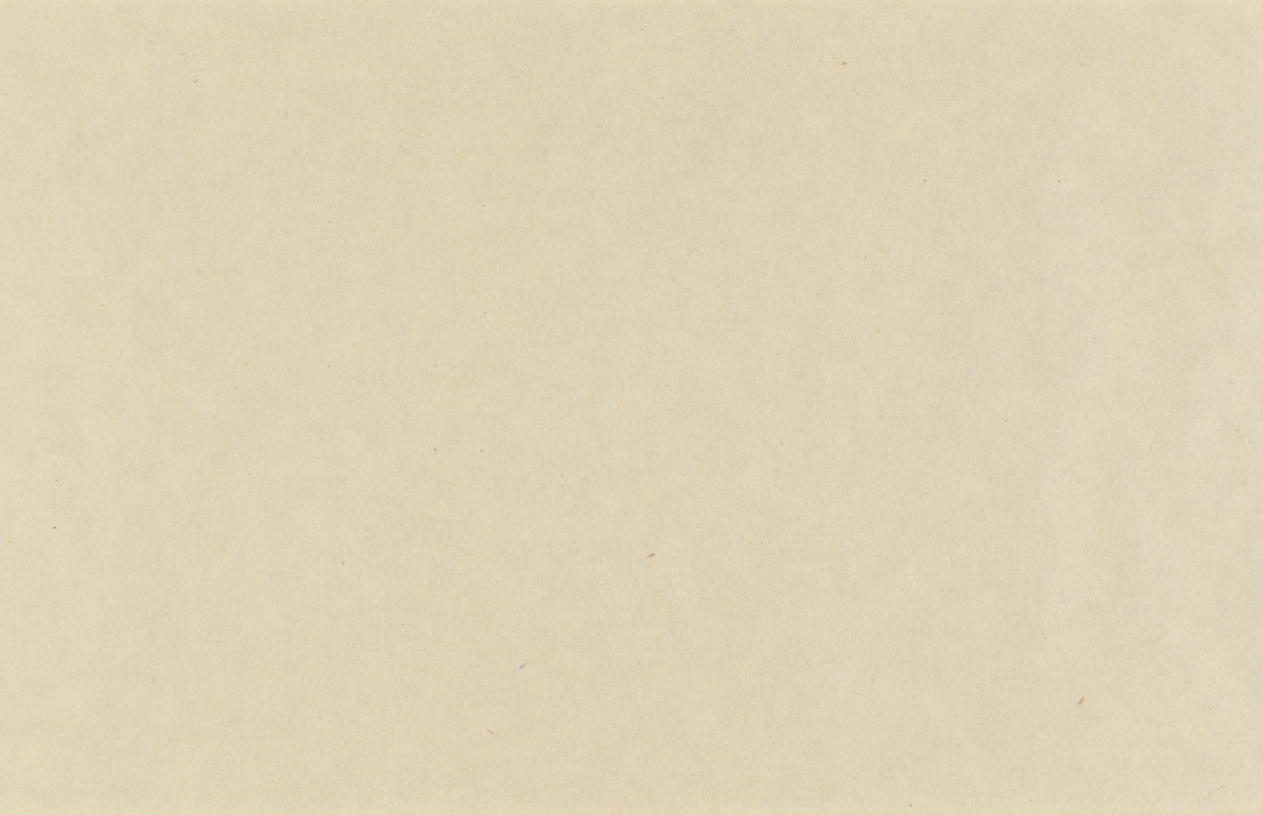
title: Eight Views of Xiao-Xiang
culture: Japan, Muromachi period (1392–1573)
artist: Sesson Shūkei (Japanese, c. 1492–c. 1577)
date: 1500s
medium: handscroll; ink on paper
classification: Painting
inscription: Signature and seal of artist at end of painting.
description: Eight Views of the Xiao and Xiang Rivers can be traced to 11th-century Chinese poems and paintings, the depiction of which had also become popular among Korean and Japanese painters. Xiao-Xiang refers to the region in present-day Hunan province where the Xiao and Xiang rivers converge. Few painters of the Eight Views had in fact seen the scenery; rather, they were trying to portray in ink and wash the lyrical qualities of dim light and a misty atmosphere typical of that region. Each of the poetic titles suggests a time of day, a season, or specific atmospheric conditions—subjects that challenged the abilities of the most talented artists. In this miniature painting (shukuzu) of the Muromachi period, Japanese Zen monk and painter Shukei Sesson depicted all eight views featured in Chinese prototypes: Wild Geese Descending to Sandbar; Returning Sails Off a Distant Coast; Mountain Market in Clearing Mist; River and Sky in Evening Snow; Autumn Moon over Dongting Lake; Night Rain on the Xiao and Xiang; Evening Bell from Mist-Shrouded Temple; and Fishing Village in Evening Glow.